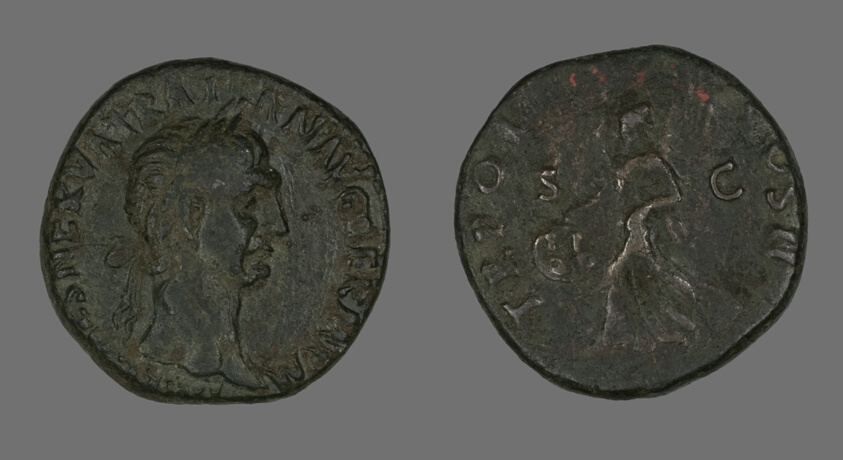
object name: Coin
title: Sestertius (Coin) Portraying Emperor Trajan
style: roman (ancient, style or period)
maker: Roman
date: Roman Period, 98-117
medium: Bronze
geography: Roman Empire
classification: coin; ancient art